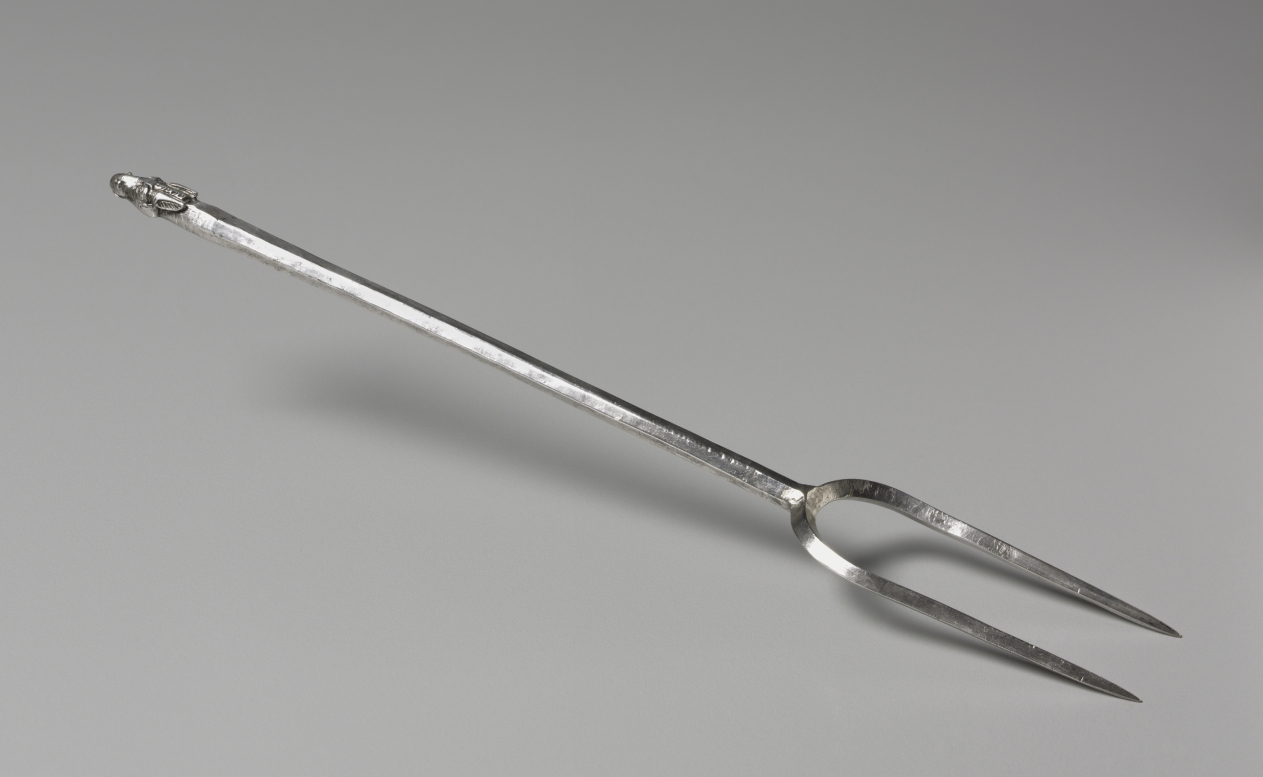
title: Fork with Mule-Head Finial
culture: Italy, Roman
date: 375–425 CE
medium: silver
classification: Metalwork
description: This two-tined silver fork has a faceted handle that terminates in a mule head, perhaps a nod to its use for meat— whether cooking, serving, or eating. Forks from the premodern Mediterranean are rare, only known through a small number of surviving examples. Extant forks are relatively large and often bronze, making this silver example still more rare.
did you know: This fork served a utilitarian purpose as flatware in antiquity.